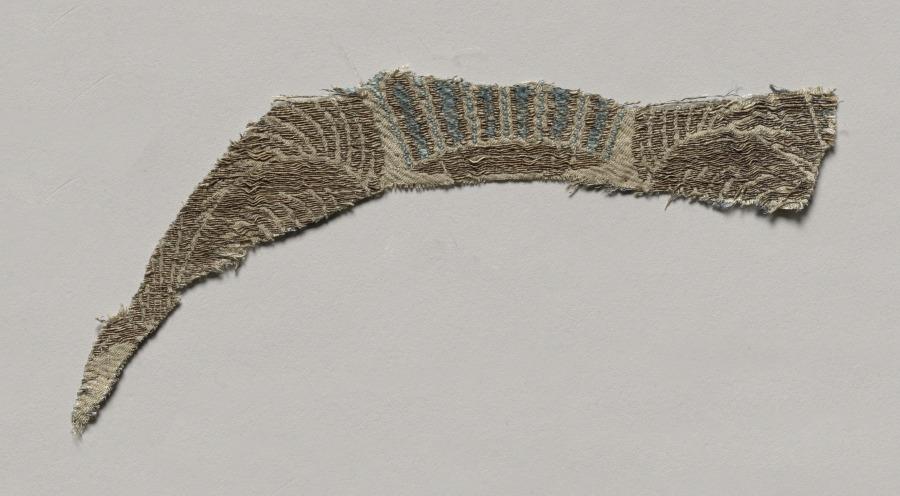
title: Silk Fragment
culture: Italy, last third of the 14th century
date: 1360–1399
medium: lampas weave, silk and gold thread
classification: Textile